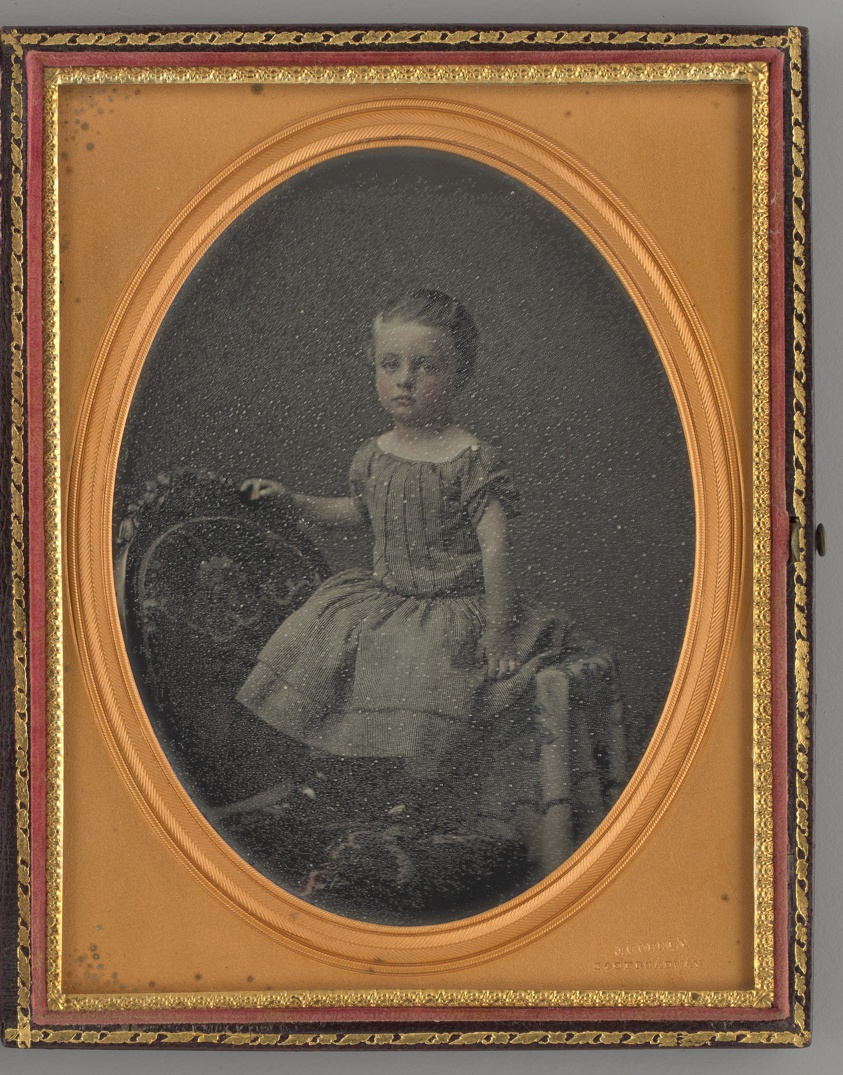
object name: Photograph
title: Untitled (Portrait of Child)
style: 19th century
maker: Jeremiah Gurney; American, 1812-1895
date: 1855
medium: Daguerreotype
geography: United States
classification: portrait; photograph; photographic process; photography; portrait; daguerreotype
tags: lundberg collection, portrait, portraits, portraits: child subject